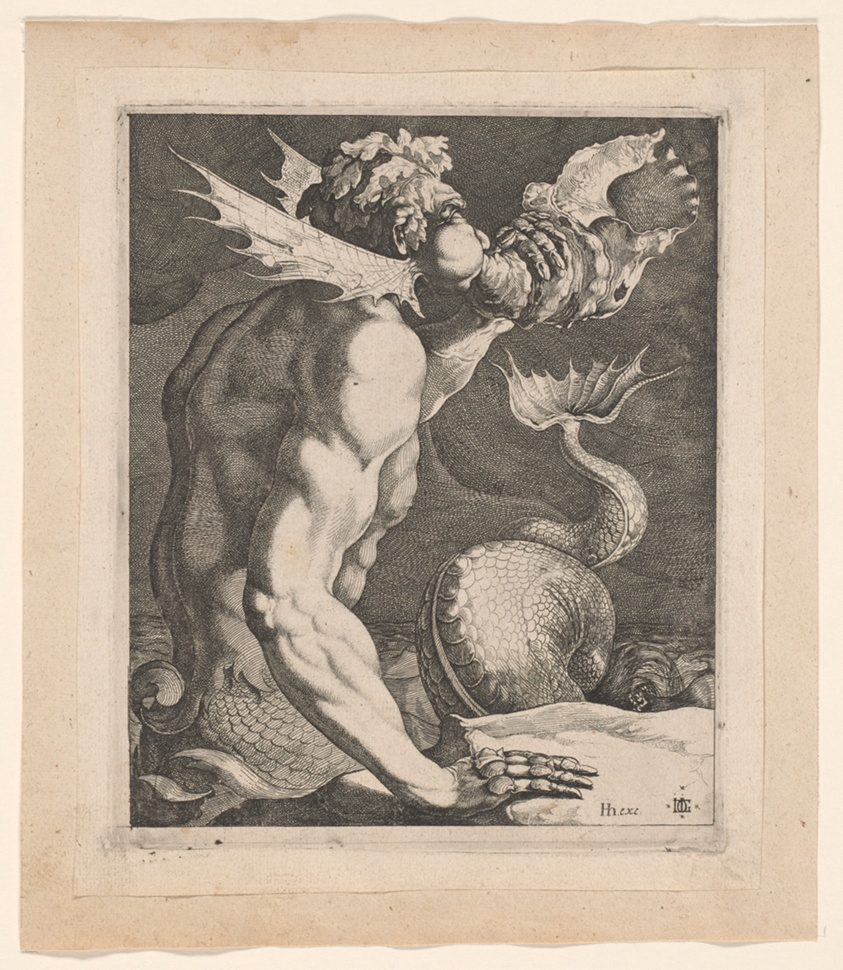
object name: Print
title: Triton Blowing a Conch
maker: Jacques de Gheyn III; Dutch, c. 1596–1641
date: c. 1618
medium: Etching in black on cream laid paper, laid down on cream laid paper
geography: Netherlands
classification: etching; print; paper; prints and drawing